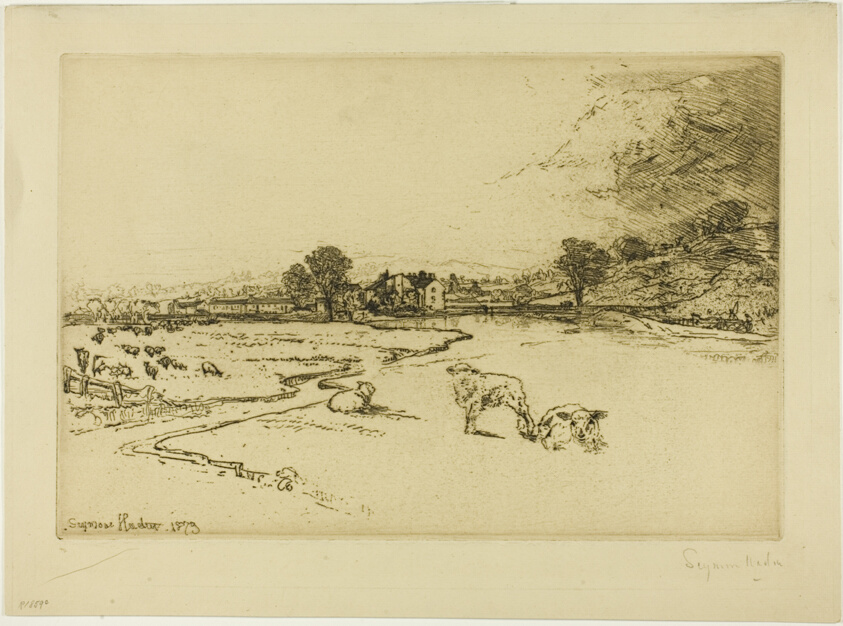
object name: Print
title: Sawley Abbey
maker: Francis Seymour Haden (English, 1818-1910)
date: 1873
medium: Etching on zinc printed on cream wove paper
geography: England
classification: etching; print; prints and drawing